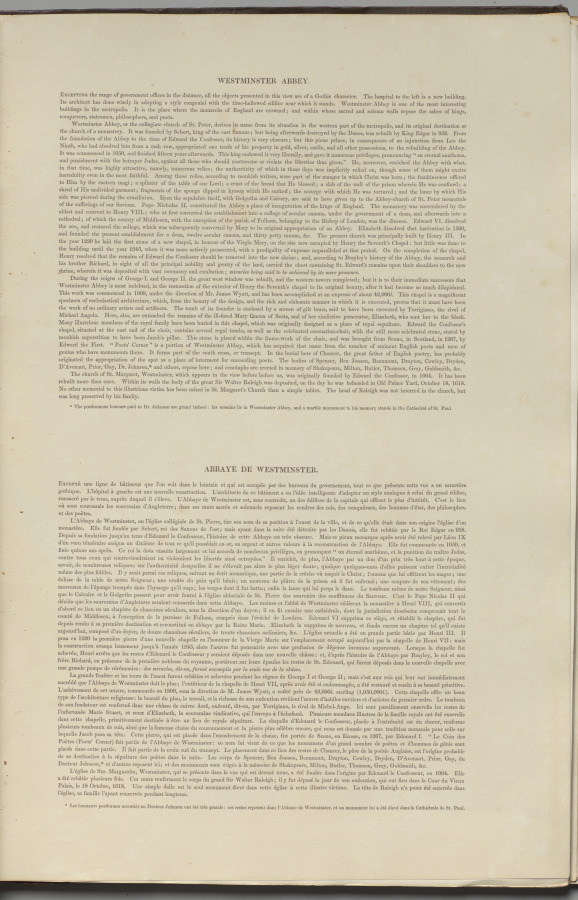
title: London As It Is: Westminster Abbey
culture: England, 19th century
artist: Thomas Shotter Boys (British, 1803–1874)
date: 1842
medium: lithograph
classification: Bound Volume